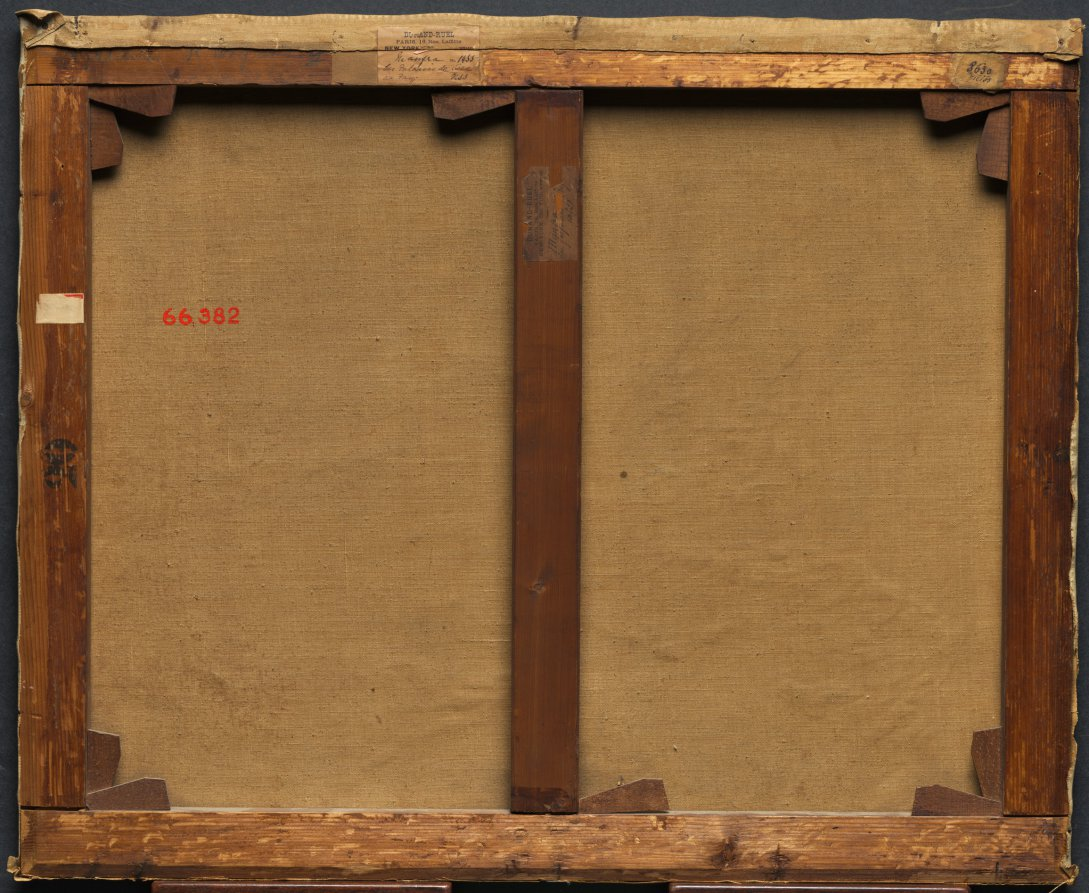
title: The Cliffs at Beg-ar-Fry, Saint-Jean-du-Doigt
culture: France, 19th century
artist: Maxime Maufra (French, 1861–1918)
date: 1895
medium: oil on fabric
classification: Painting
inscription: Signed lower left: Maufra 95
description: Maxime Maufra was initially an amateur artist, but in 1883 he gave up a career in business to devote himself entirely to painting. He traveled throughout Normandy and Britany painting sea- and landscapes. During a visit to Pont-Aven in northwestern France in 1890 he met Paul Gauguin and a group of young artists who were inspired by Gauguin’s approaches to color and composition in his art. In particular, Maufra began to translate forms into flat planes of bold color arranged in decorative patterns as seen in this seascape of the Breton coast. Perhaps the most striking aspect of this painting is the way the artist framed the composition at the left with the view of a steep cliff.